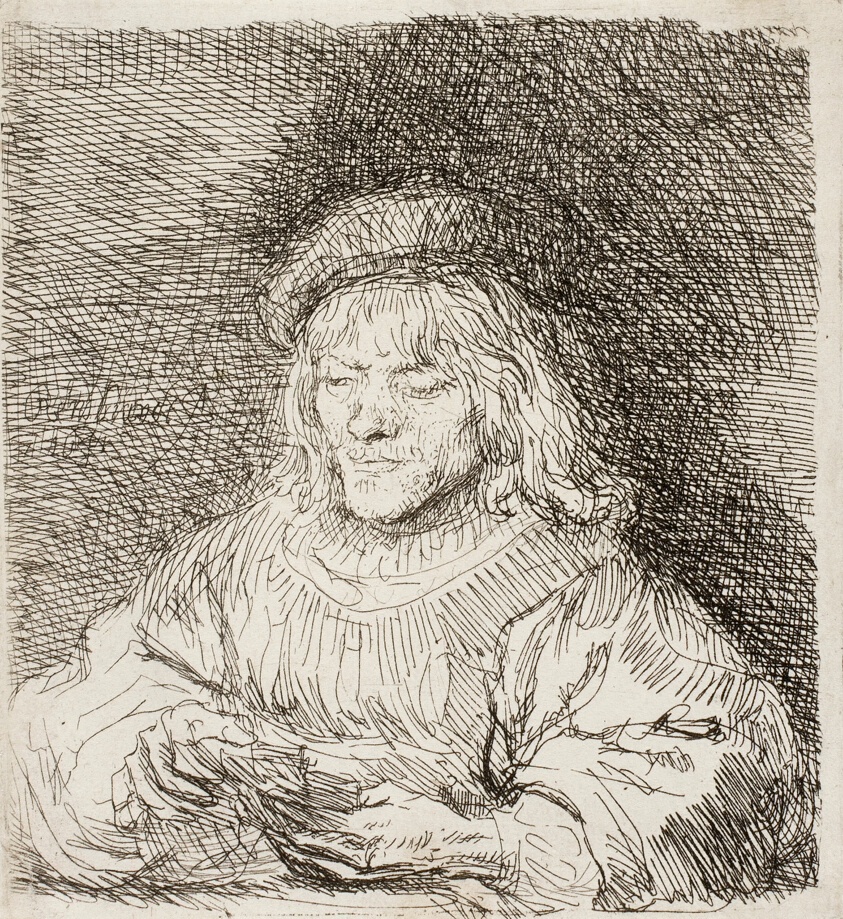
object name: Print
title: The Card Player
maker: Rembrandt van Rijn (Dutch, 1606-1669)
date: 1641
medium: Etching on paper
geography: Holland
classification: etching; print; prints and drawing; paper